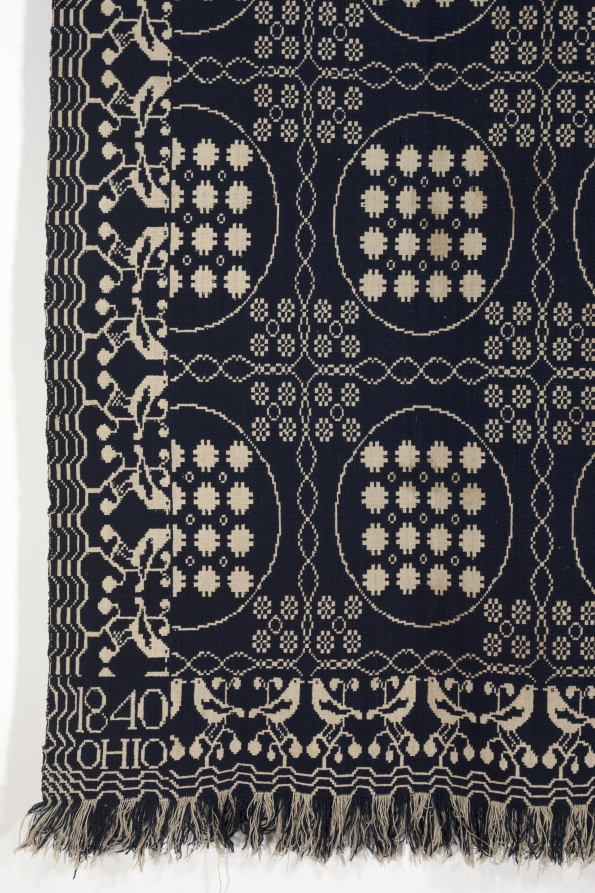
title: Coverlet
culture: America, Ohio, Clinton County, Port William, 19th century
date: 1840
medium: double weave: wool and cotton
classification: Textile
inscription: "1840 / OHIO" woven in two corners.